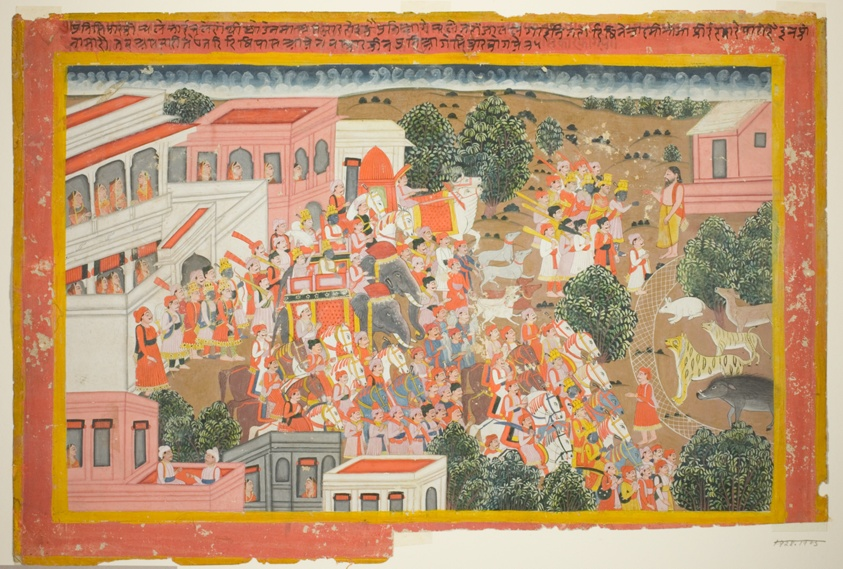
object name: Painting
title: Four Princes in Procession Visit a Sage, page from a copy of the Ramayana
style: South Asian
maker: India; Rajasthan, Jaipur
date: c. 1820-1840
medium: Opaque watercolor on paper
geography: Jaipur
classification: gouache; painting; asian art